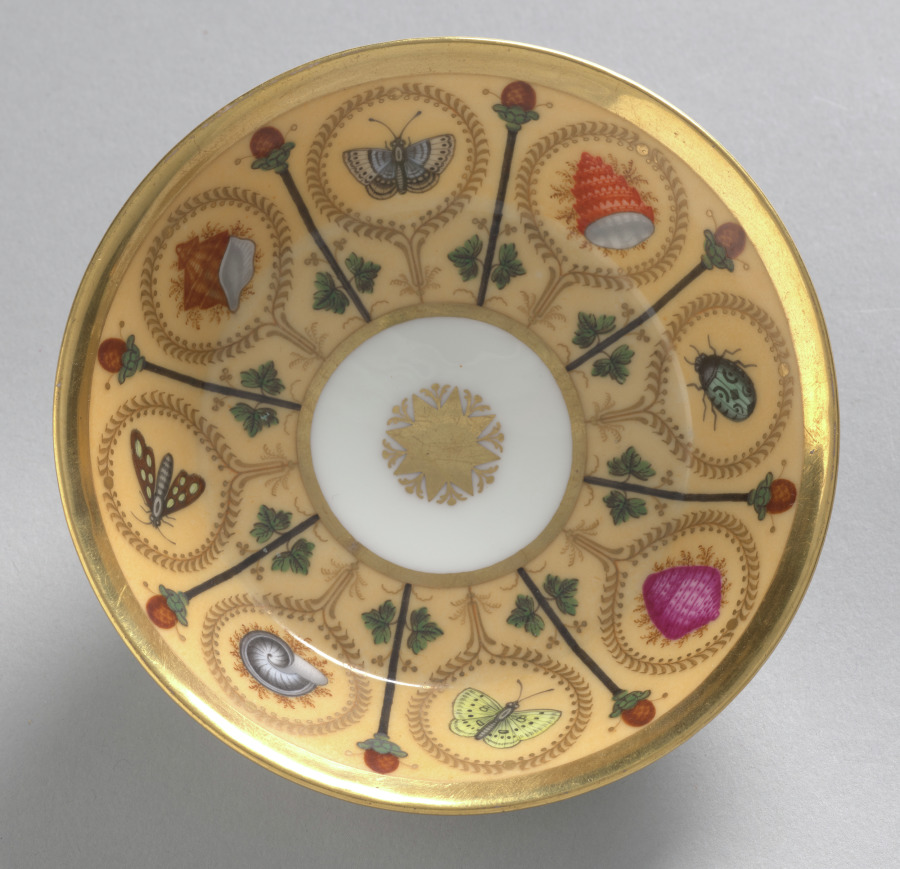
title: Saucer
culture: France, 19th century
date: c. 1800–1810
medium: porcelain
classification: Ceramic